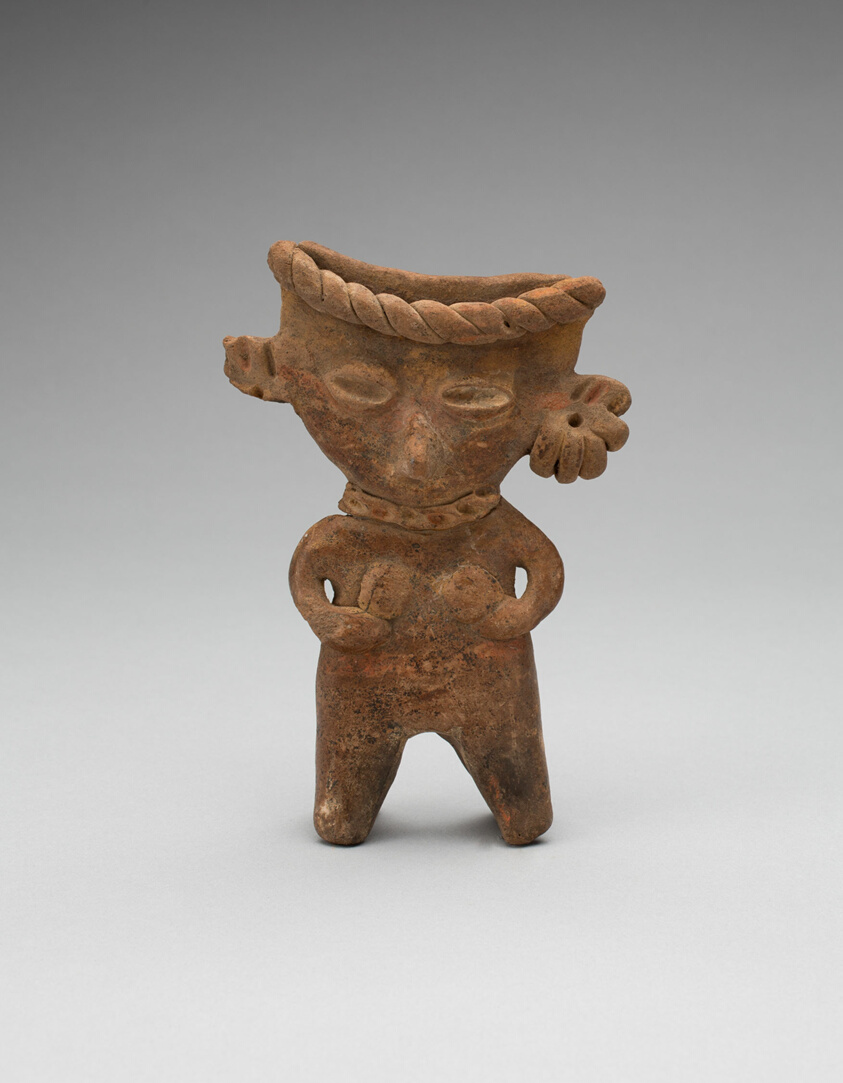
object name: Sculpture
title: Standing Female Figure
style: michoacan, Arts of the Americas, mesoamerican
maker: Michoacan (Michoacan, Mexico)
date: 300 BCE–250 CE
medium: Ceramic and pigment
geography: Michoacán state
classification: earthenware; art of the americas; ceramics; sculpture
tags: people